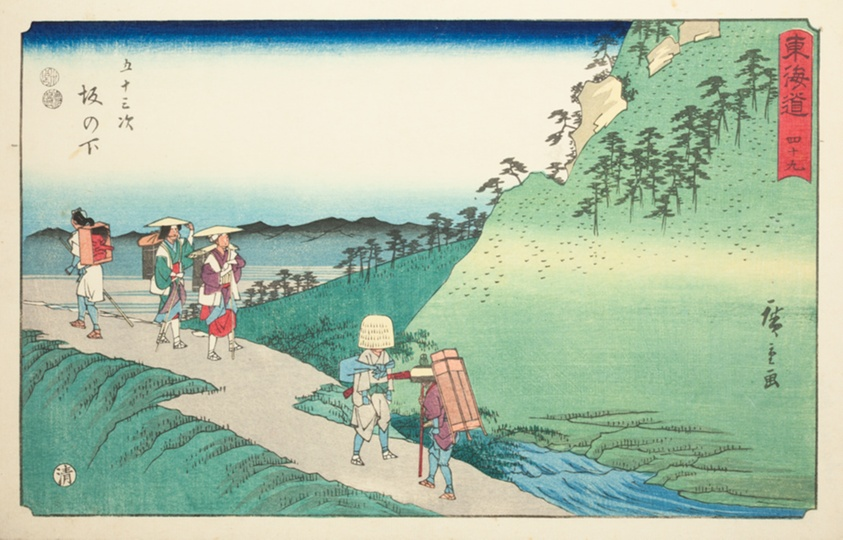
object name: Print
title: Sakanoshita—No. 49, from the series "Fifty-three Stations of the Tokaido (Tokaido gojusan tsugi)," also known as the Reisho Tokaido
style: Japanese (culture or style)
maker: Utagawa Hiroshige 歌川 広重; Japanese, 1797-1858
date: c. 1847/52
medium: Color woodblock print; oban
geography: Japan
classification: woodblock print; print; asian art